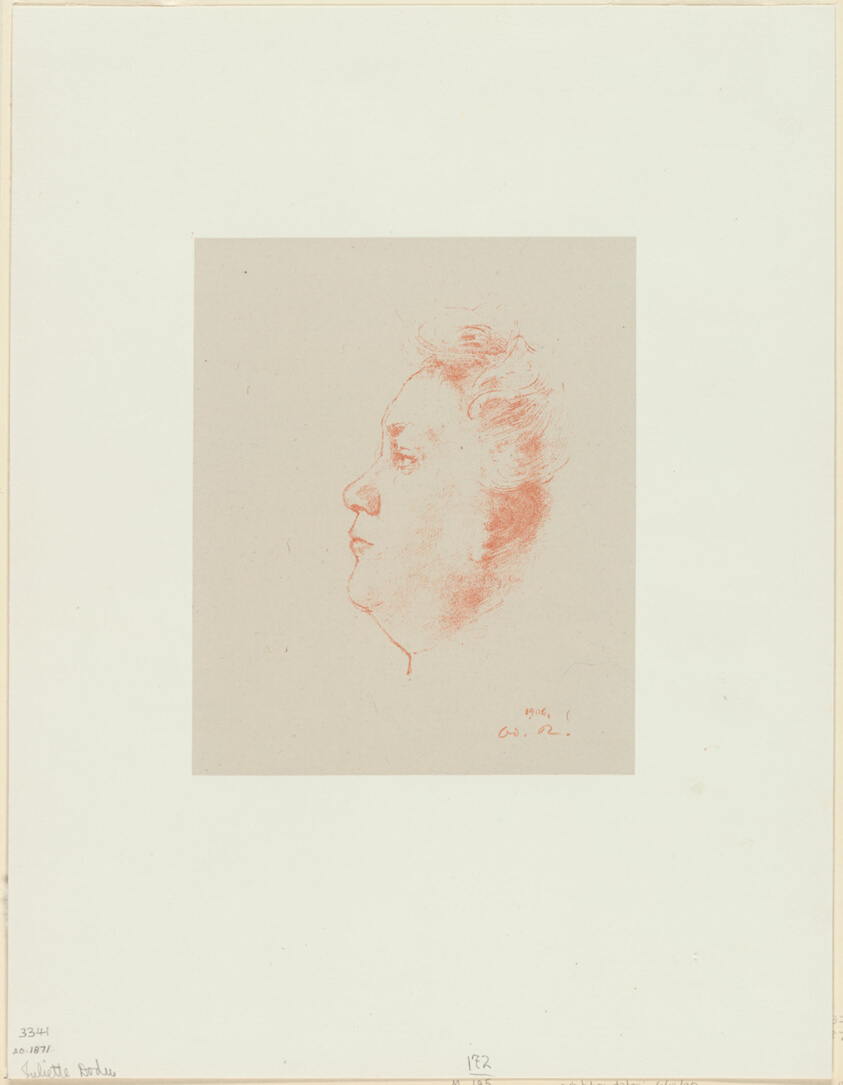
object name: Print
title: Juliette Dodu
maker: Odilon Redon (French, 1840-1916)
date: 1904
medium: Lithograph in sanguine on gray-green China paper laid down on ivory wove paper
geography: France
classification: lithograph; print; prints and drawing; paper